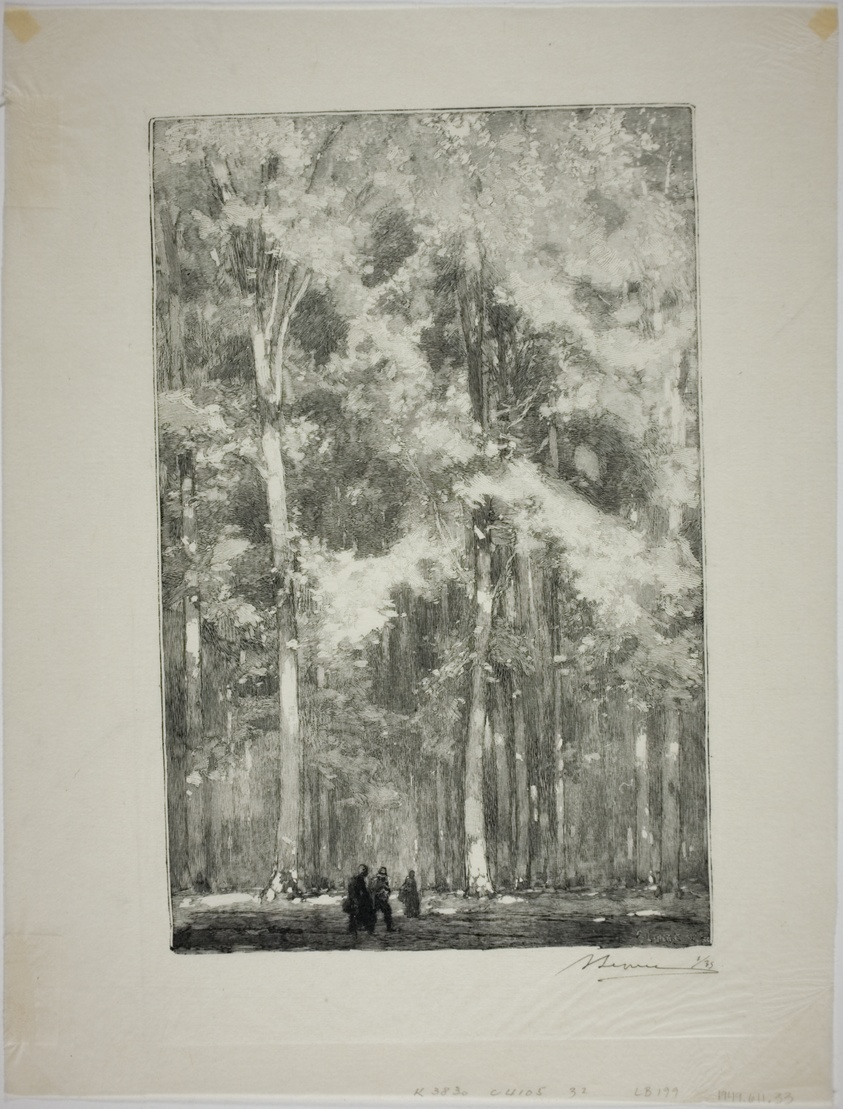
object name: Print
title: Morning, Crossroads of the Forts de Marlotte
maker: Louis Auguste Lepère (French, 1849-1918); published by A. Desmoulins (French, active c. 1908-1910)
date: 1889, published 1908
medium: Wood engraving in black on cream laid Japanese paper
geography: France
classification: wood engraving; print; prints and drawing